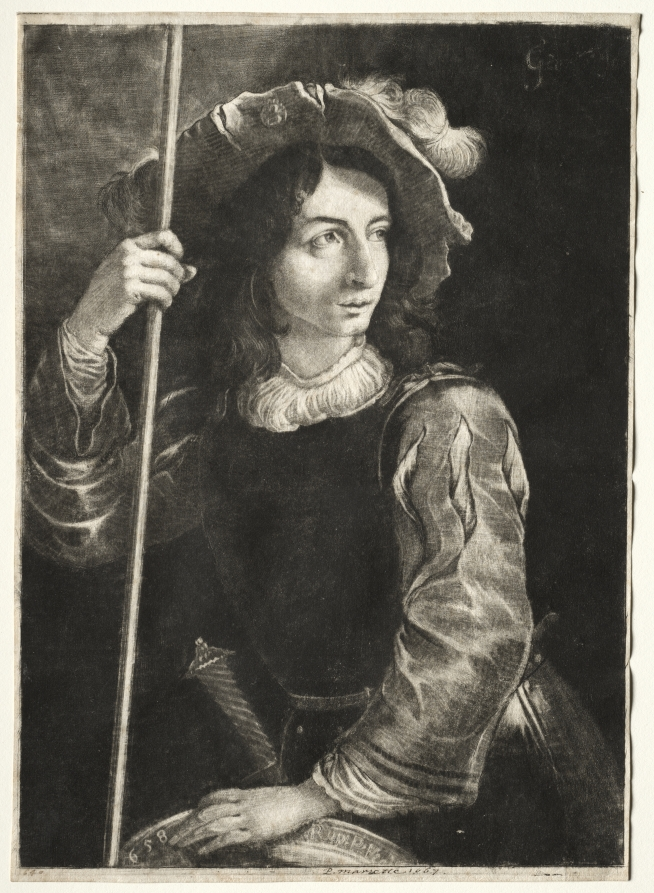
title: The Standard Bearer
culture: Germany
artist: Prince Ruprecht (German, 1619–1682)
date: 1658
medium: mezzotint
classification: Print